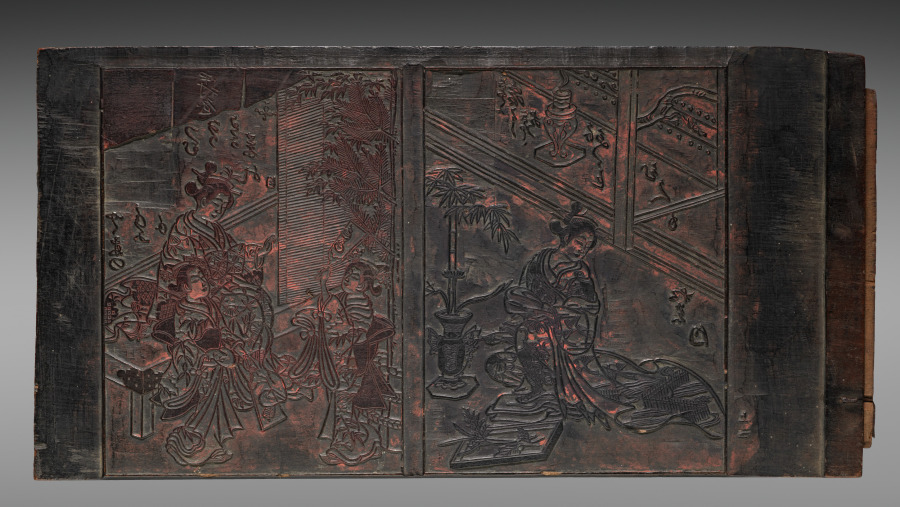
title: Print Block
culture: Japan, Edo period (1615–1868)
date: 1700s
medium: woodblock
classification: Woodblock